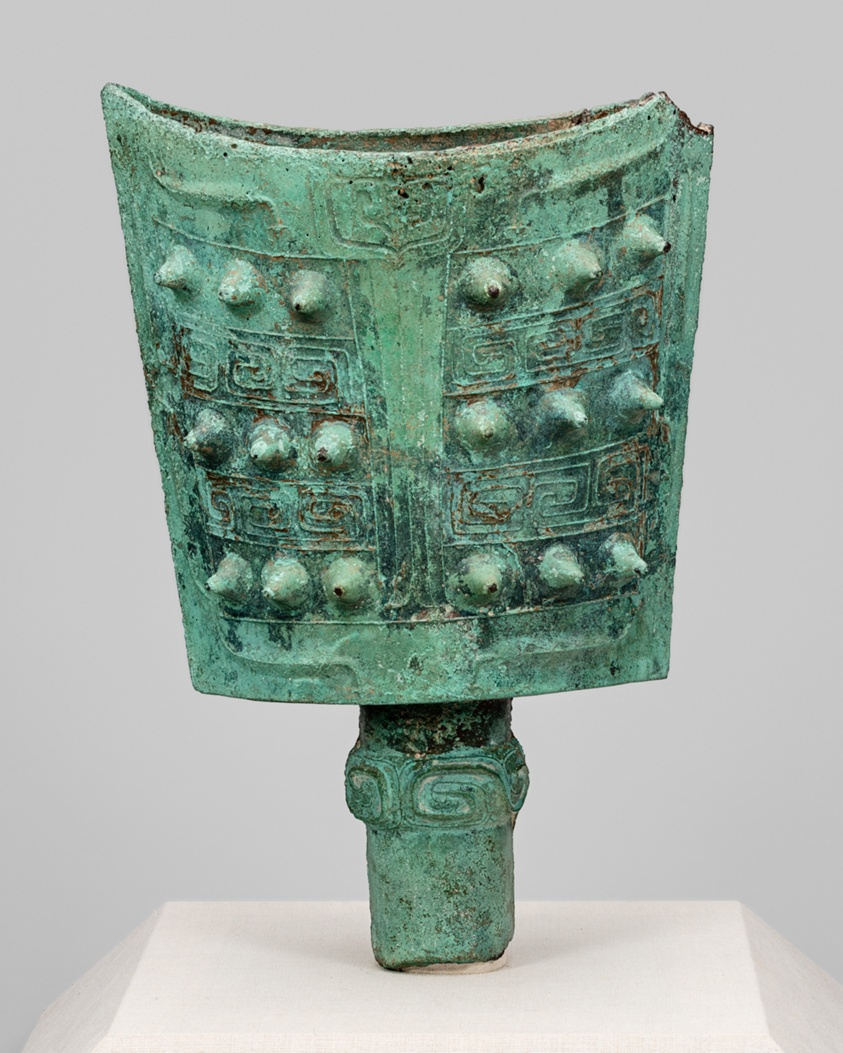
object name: Religious/Ritual Object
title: Bell (nao)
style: Chinese (culture or style)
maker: China, probably Hunan province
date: Western Zhou dynasty (1046–771 B.C.)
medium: Bronze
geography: China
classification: bronze; asian art; ritual objects